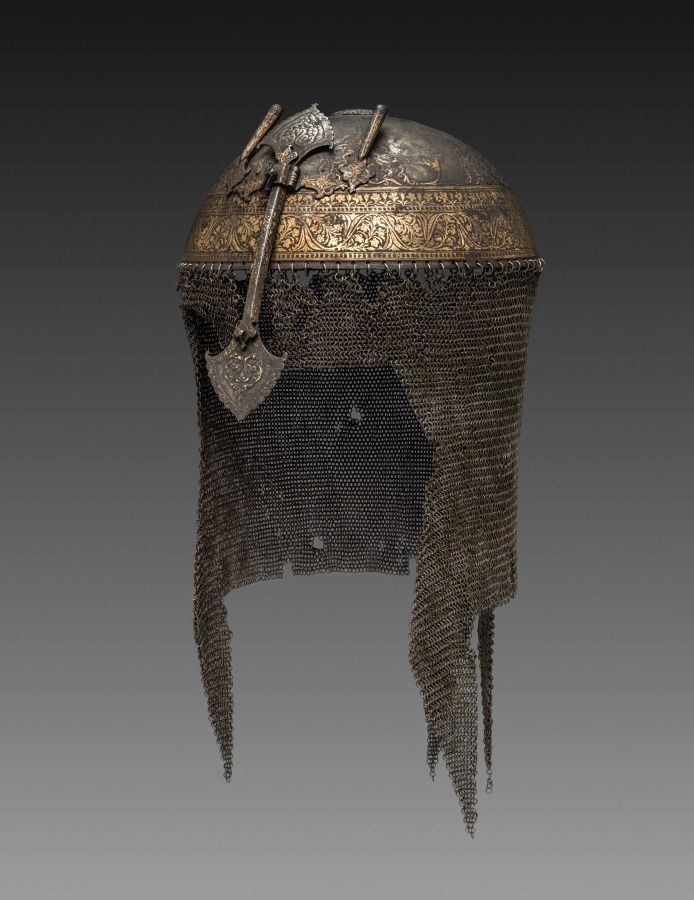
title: Helmet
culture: North India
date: 1600s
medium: steel with gold and brass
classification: Arms and Armor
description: Mughal soldiers wore hemispherical steel helmets to battle. This helmet’s surface features decorative floral patterns created using a process called damascening, in which gold wire was hammered into steel grooves. A leaf-shaped guard slides down in front of the nose for protection. The short tubes on either side of the nasal guard were for holding plumes, most popularly black heron feathers or white aigrettes. The spike that would have been on the apex has broken off. Also missing is the stuffed cotton padding that lined the interior. Chain mail made up of interlocking steel wire rings protected the ears, neck, and shoulders.